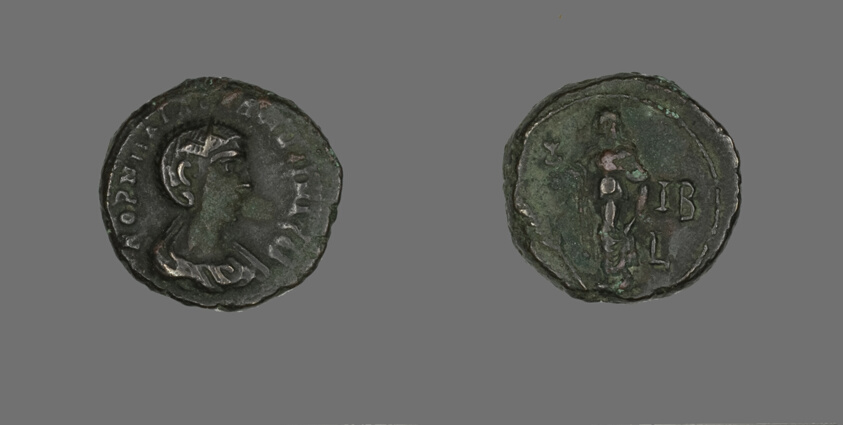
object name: Coin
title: Tetradrachm (Coin) Portraying Empress Salonina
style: roman (ancient, style or period), ancient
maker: Roman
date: about 265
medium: Billon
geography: Roman Empire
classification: coin; ancient art